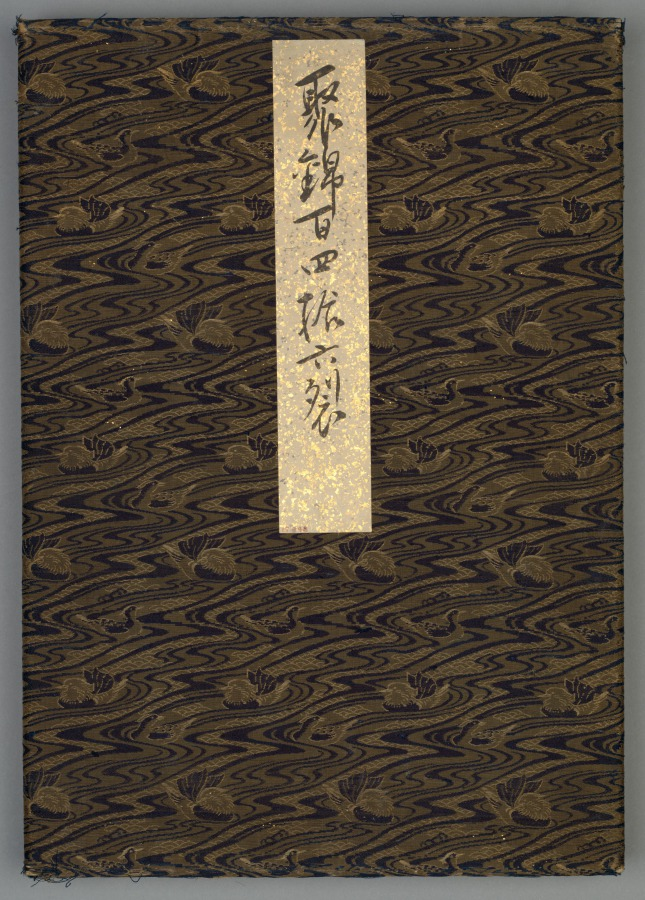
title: Album of Textile Samples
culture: Japan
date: 1790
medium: silk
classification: Textile